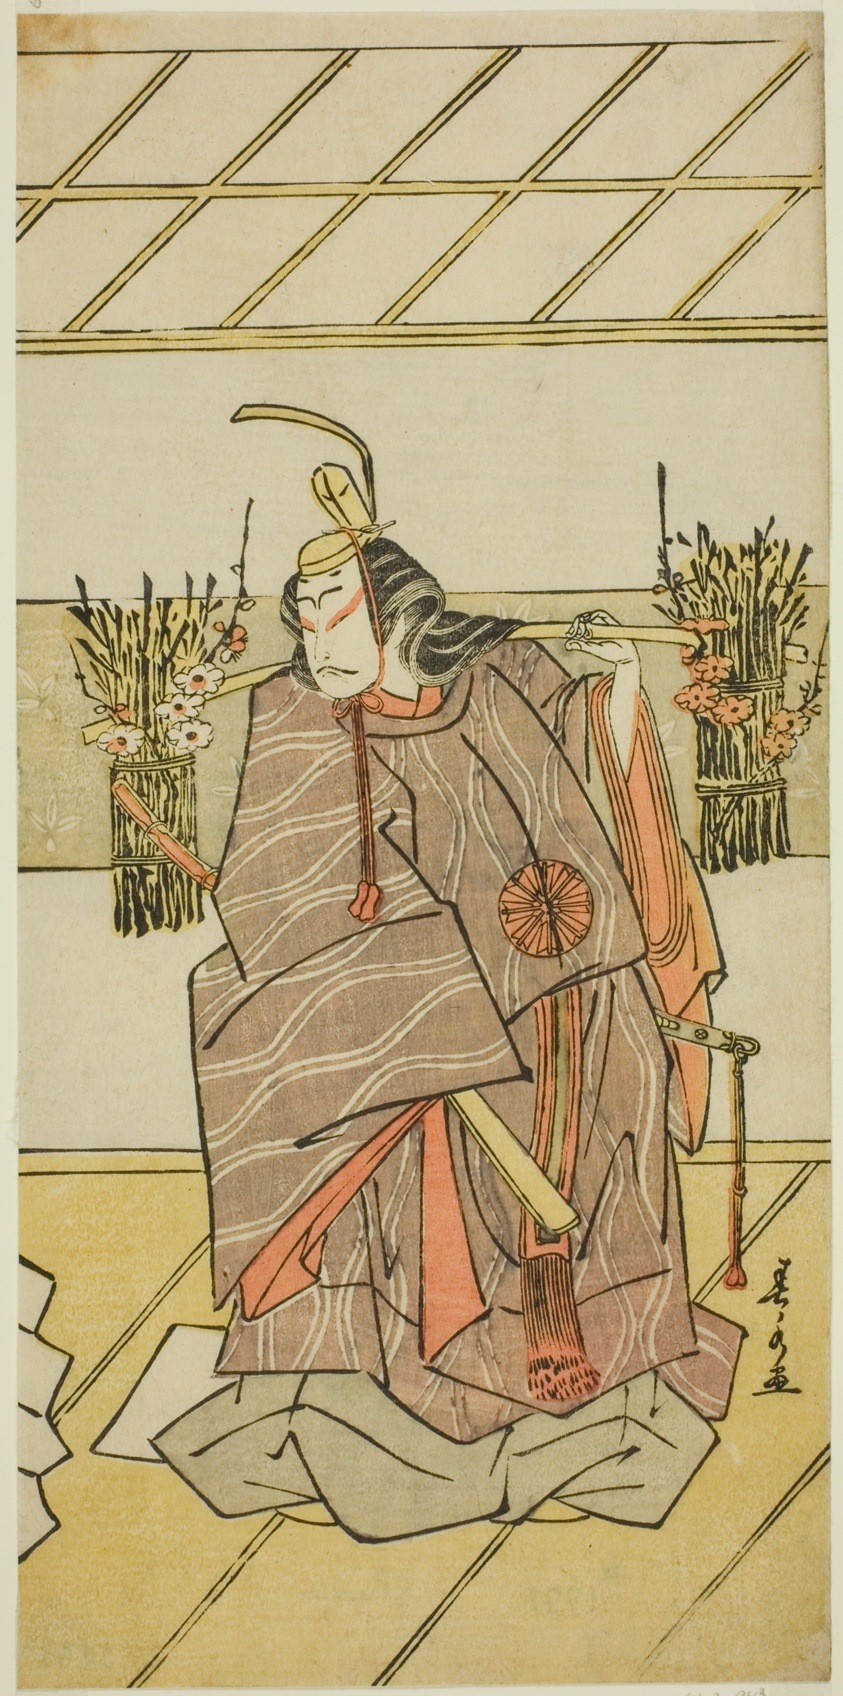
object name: Print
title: The Actor Nakamura Tomijuro I as the Spirit of Taira no Masakado Disguised as Otomo no Kuronushi in the Play Shida Yuzuriha Horai Soga, Performed at the Morita Theater in the First Month, 1775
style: Japanese (culture or style)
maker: Tamagawa Shunsui (Japanese, active c. 1770s)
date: c. 1775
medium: Color woodblock print; hosoban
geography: Japan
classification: woodblock print; print; asian art